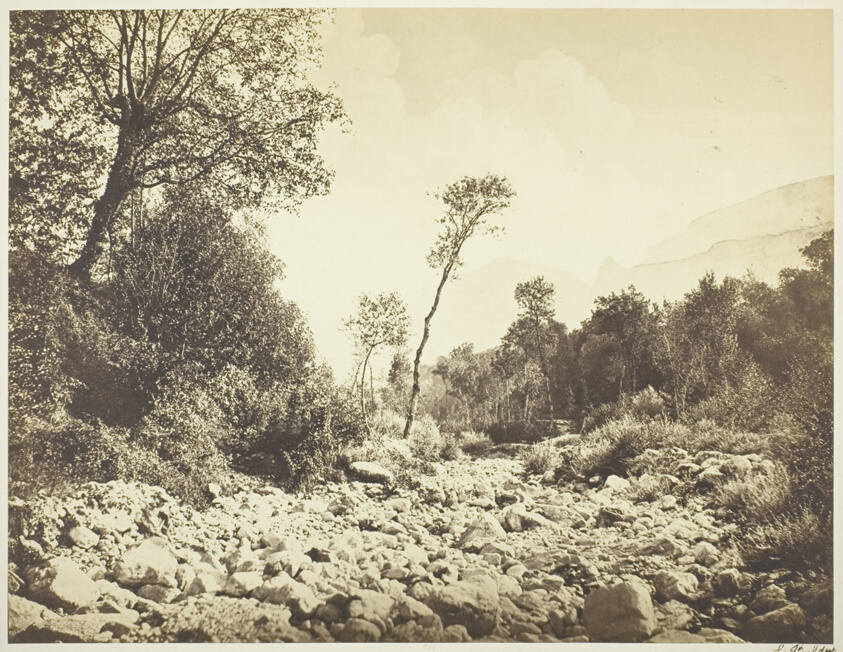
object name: Photograph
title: Voreppe (Dauphine)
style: 19th century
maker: Édouard Baldus; French, born Germany, 1813–1889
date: c. 1855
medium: Albumen print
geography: France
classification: albumen silver print; photographic process; photography; photograph